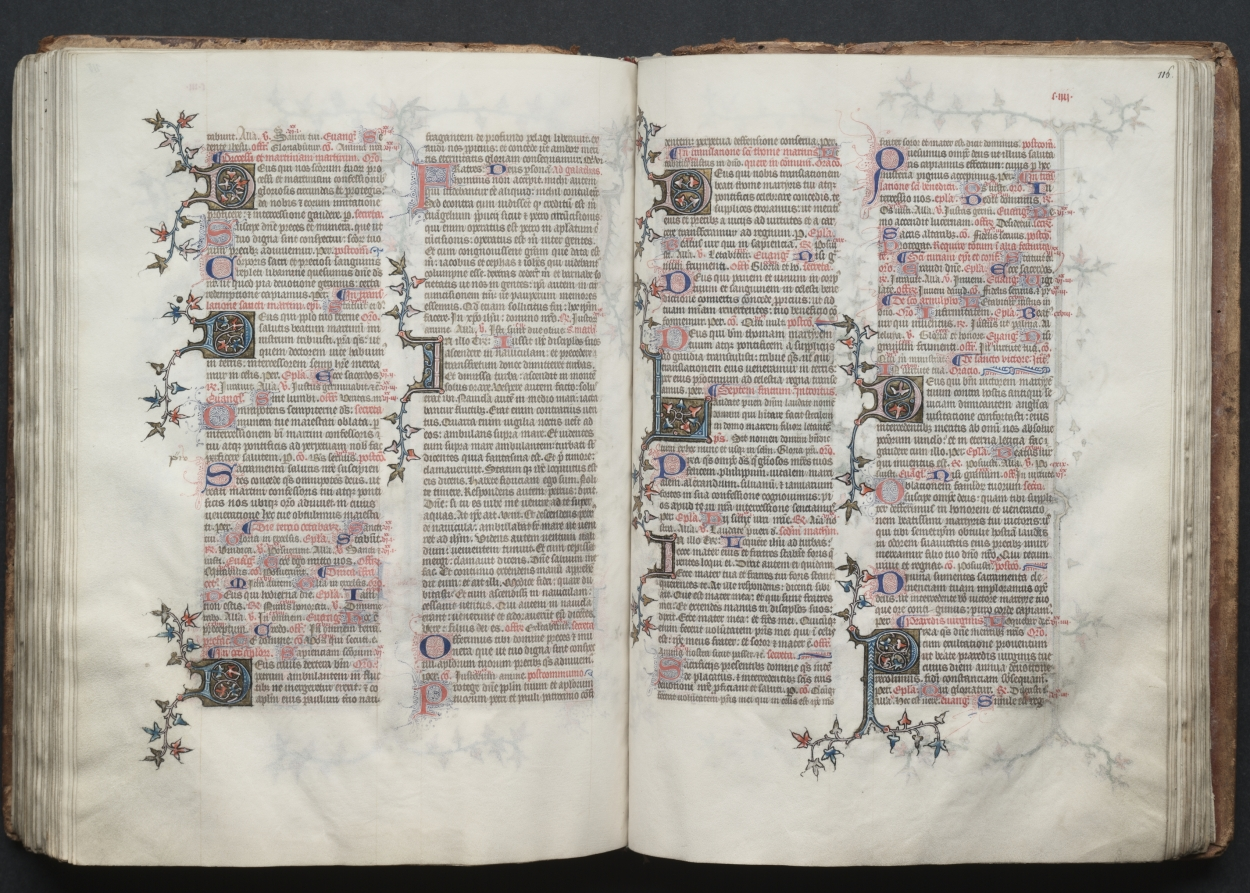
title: The Gotha Missal: Fol. 116r, Text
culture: France, Paris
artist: Master of the Boqueteaux (French)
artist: and Workshop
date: c. 1375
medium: ink, tempera, and gold on vellum; blind-tooled leather binding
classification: Bound Volume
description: The style and quality of this manuscript's decoration is typical of deluxe Parisian books made for aristocratic or royal patrons. Most of the book's decoration appears to be the work of the Master of the Boqueteaux, an artist active at the court of King Charles V (died 1380). His style was apparently shared by a number of book illuminators working in and around Paris. It is very possible that the Gotha Missal belonged to Charles V, but is not provable because the manuscript has no royal portraits and lacks a colophon. Given the book's magnificent decoration, however, it would seem that it was produced for a Valois prince, if not for the king himself. The manuscript receives its name from the German dukes of Gotha, its later owners.